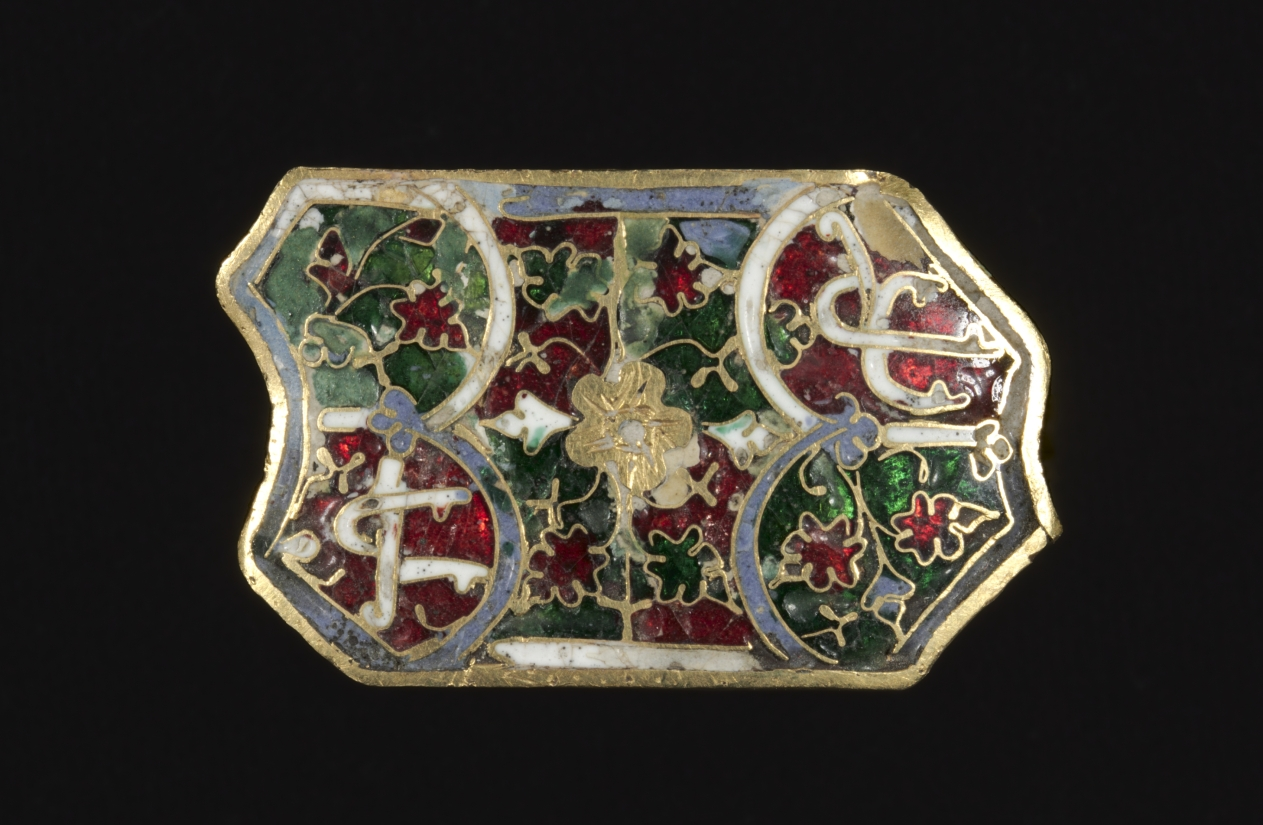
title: Plaque (Appliqué)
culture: Spain (Hispano-Moresque), 14th century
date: 1300s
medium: translucent enamel on gold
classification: Enamel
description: This oblong plaque is decorated with pseudo-Kufic (fake Arabic) designs indicating that it was produced in Spain under Muslim influence. It may have served as an applied ornament to some article of personal adornment such as a belt. It is possible that the design was inspired by Arabic coinage.